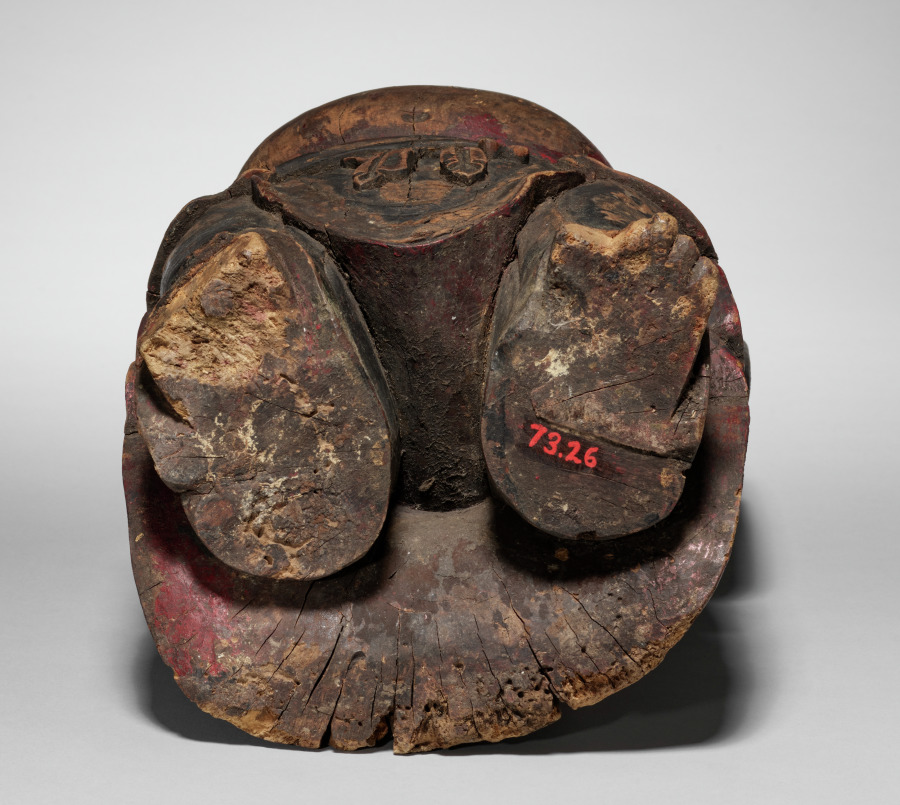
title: The Monk Budai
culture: China, Ming dynasty (1368–1644)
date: 1400s–1500s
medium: wood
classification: Sculpture